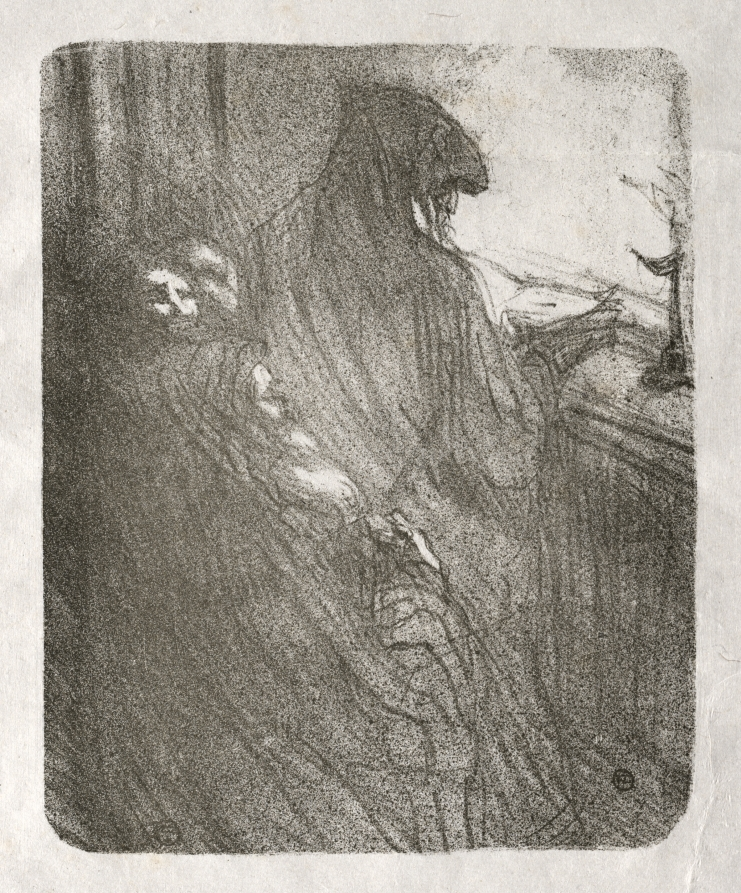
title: Au pied du Sinaï: La Prière des Juifs Polonais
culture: France, 19th century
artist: Henri de Toulouse-Lautrec (French, 1864–1901)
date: 1898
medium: lithograph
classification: Print